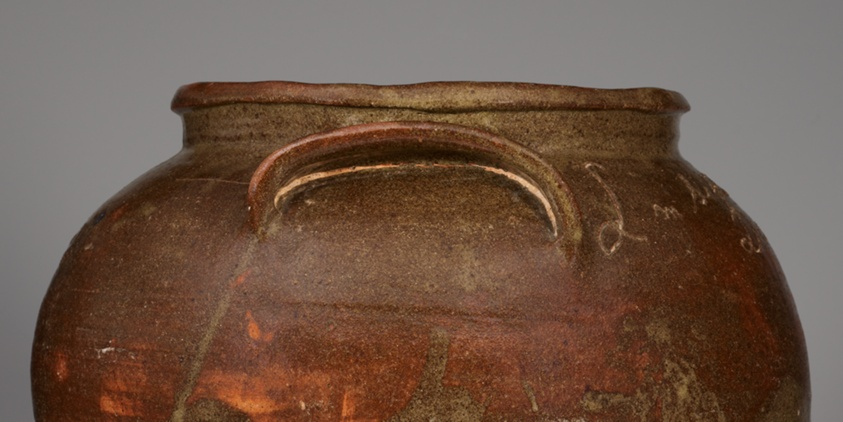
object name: Ceramics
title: Storage Jar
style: 19th century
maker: David Drake (American, c. 1801–1870s); Lewis Miles Stoney Bluff Manufactory [plantation] (American, c. 1840–70s); Edgefield, South Carolina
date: 1857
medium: Stoneware and glaze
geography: Edgefield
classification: container; american decorative arts; pottery; ceramics; stoneware; vessel; decorative arts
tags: storage